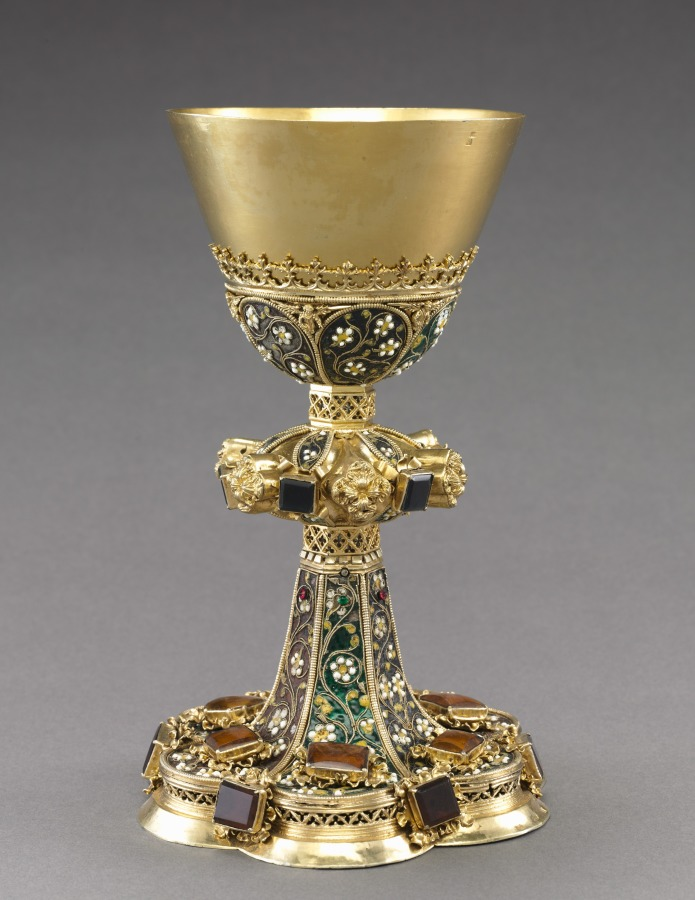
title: Chalice and Paten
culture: Hungary, Budapest?, 15th century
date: c. 1450–1480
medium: gilt silver and filigree enamel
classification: Metalwork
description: The chalice and paten—the most important liturgical vessels—are used at the altar by the priest for the consecration of the Eucharistic bread and wine during the celebration of the mass. This chalice survives with its original paten. The form of the chalice evolved over the centuries. Gothic chalices, like this one, gradually developed angular or faceted knops, generally hexagonal, with lobed feet. This sublime example is decorated with filigree enamel consisting of twisted gold wire forming a floral design, which in turn is filled with colorful glass pastes. Gemstones add to the embellishment.